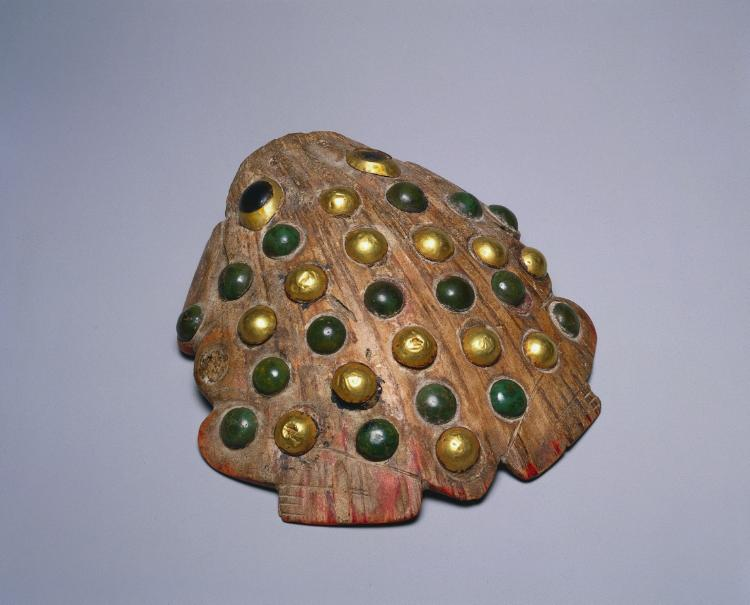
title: Frog Ornament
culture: Peru, Moche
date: 50–800 CE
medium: shell, stone, gold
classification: Jewelry